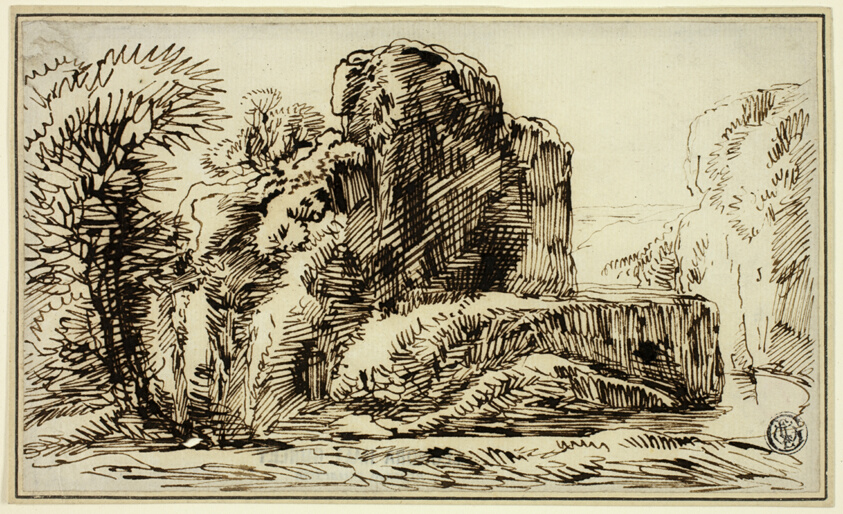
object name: Drawing and Watercolor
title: Rocks, Trees, and River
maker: Attributed to Franz Kobell; German, 1749-1822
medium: Pen and iron gall ink on ivory laid paper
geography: Germany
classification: pen and ink drawings; drawings (visual works); prints and drawing